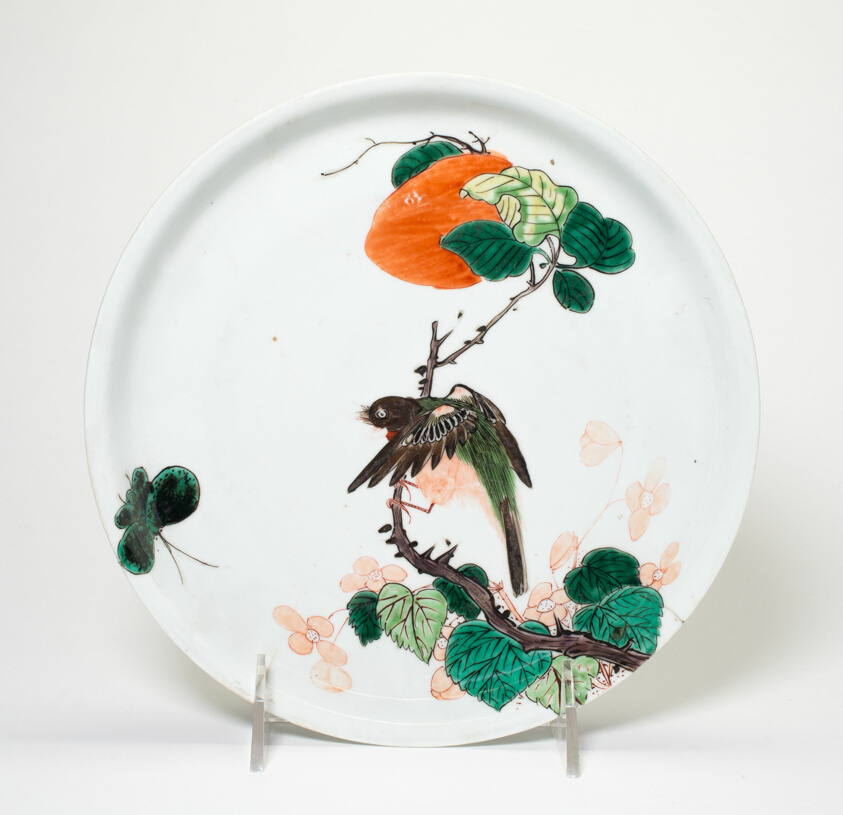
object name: Vessel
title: Dish with Bird and Butterfly by a Branch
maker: China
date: Qing dynasty (1644–1911), Kangxi period (1662–1723)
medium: Porcelain with famille verte enamel decoration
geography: China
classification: porcelain; asian art; ceramics